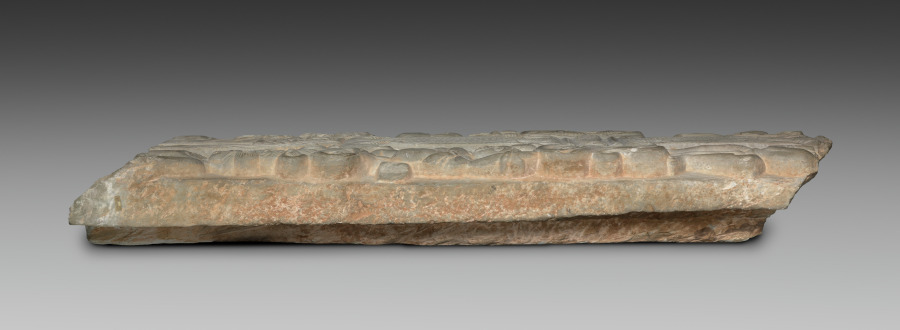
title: Veneration of the Buddha as a Fiery Pillar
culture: Southern India, Andhra Pradesh, Nagarjunakonda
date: 200s CE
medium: limestone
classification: Sculpture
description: At the bottom of this carved panel is the depiction of a pillar incised with cross-hatching and surrounded by a halo of flames. A stylized lotus and a pointed trident symbol marking good fortune and divinity crown the pillar. This image indicates the presence of the Buddha and underscores his superhuman qualities, including radiance and power to work magic. Two male figures hold fly whisks of honor on either side. Above is a golden pillar covered with jewels that the Buddha miraculously generated. Swirling leaves sprout from grooved disks at regular intervals, and celestial beings fly and dance in praise.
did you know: The acanthus leaves sprouting from the pillar echo Greco-Roman motifs.